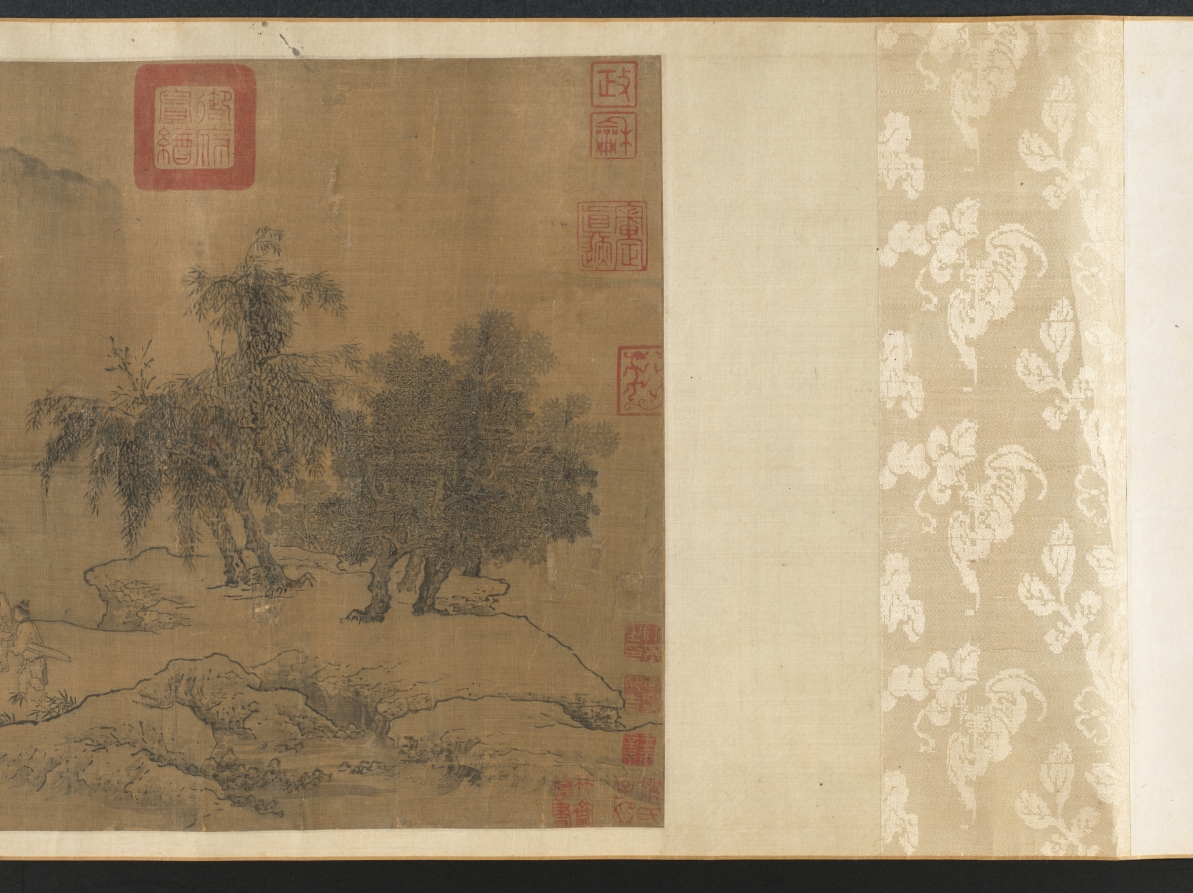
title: Tao Yuanming's Return Home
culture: China, Yuan dynasty (1271-1368)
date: 1300s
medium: Handscroll; ink and slight color on silk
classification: Painting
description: Tao Yuanming's revered poem "Return Home 歸去來辭 (Gui qu lai ci)" powerfully conveys his desire to leave bureaucratic life for the simplicity and authenticity of nature. This sentiment has deeply resonated with generations of Chinese scholars, making it a popular theme in paintings. This handscroll uses continuous narrative depicting Tao in multiple scenes from the poem. Starting on the right, the poet travels to his home. His children wait by the gate, while his wife pauses to tidy her hair before welcoming him. Then, free from the burdens of official service, Tao spends time in both nature and his cottage, where he can again enjoy wine, music, and books.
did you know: Poet Tao Yuanming 陶淵明 (c. 365–427 CE) returned to a secluded life instead of pursuing a civil service career.